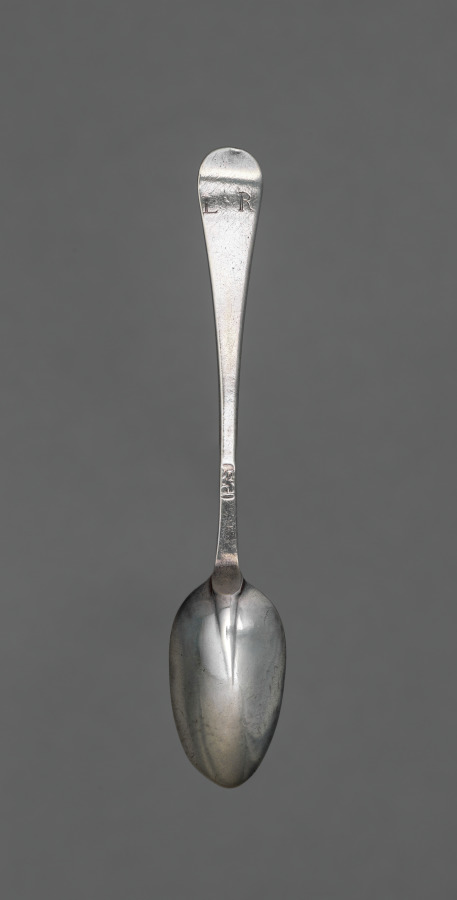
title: Teaspoon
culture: America, Pennsylvania, Philadelphia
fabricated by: Philip Syng (American, 1703–1789)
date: c. 1730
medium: silver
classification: Silver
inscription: engraved "L - R" in block letters on back of handle end.